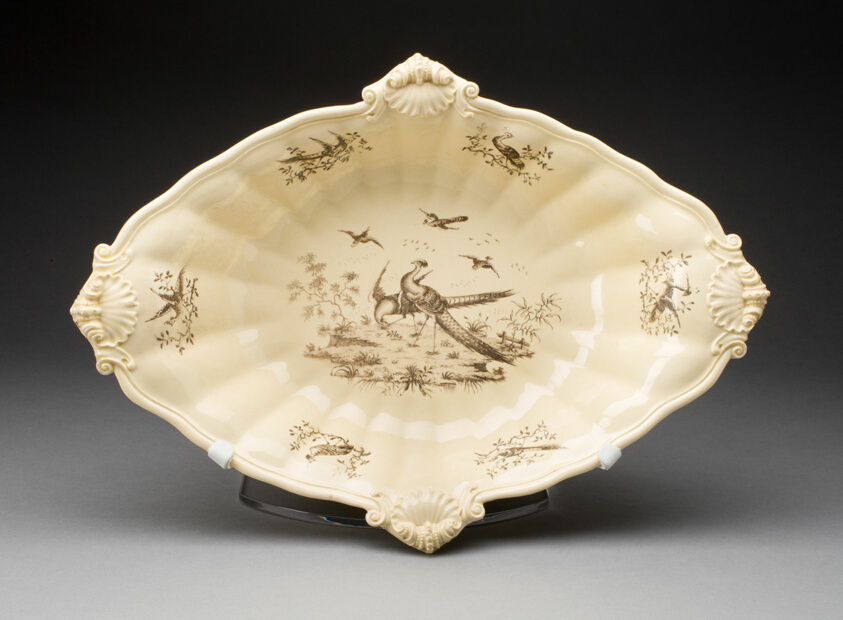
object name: Ceramics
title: Bowl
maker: England, Staffordshire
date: c. 1780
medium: Lead-glazed earthenware (creamware), transfer-printed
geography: Staffordshire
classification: bowl; creamware; earthenware; dish (vessel); ceramics; lead-glazed earthenware; european decorative arts